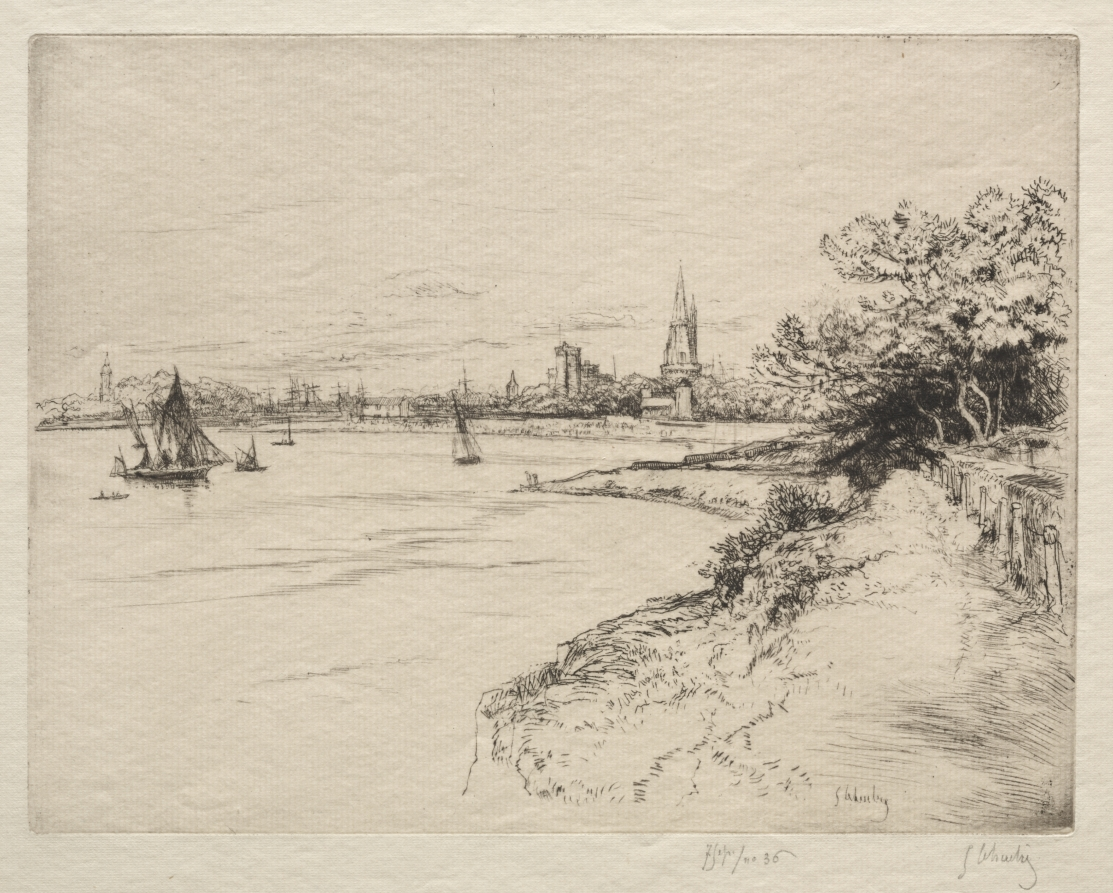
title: La Falaise d'Orbigny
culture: France, 19th century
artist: Gustave Leheutre (French, 1861–1932)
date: c. 1922–23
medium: etching and drypoint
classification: Print